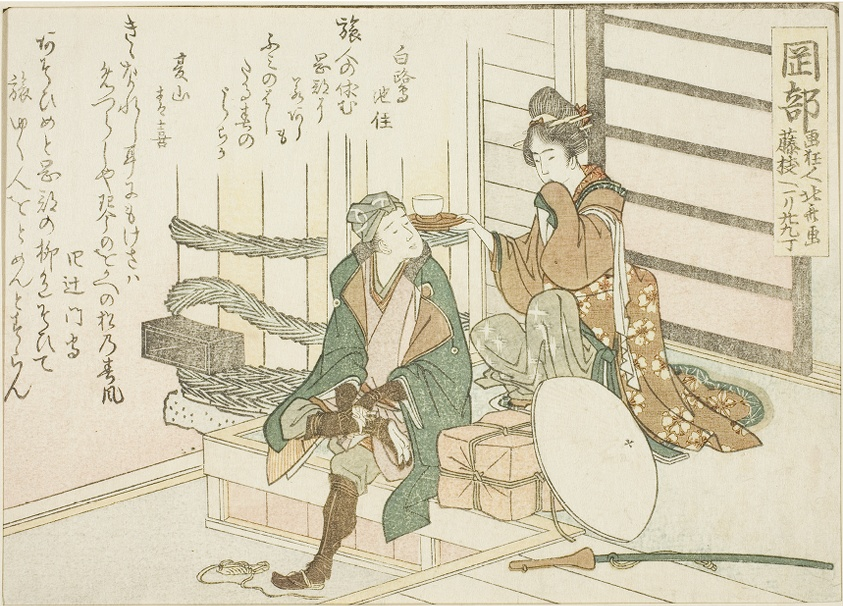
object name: Print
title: Okabe, from an untitled series of the fifty-three stations of the Tokaido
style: Japanese (culture or style)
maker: Katsushika Hokusai 葛飾 北斎; Japanese, 1760-1849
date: c. 1804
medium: Color woodblock print; kokonotsugiri-ban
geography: Japan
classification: woodblock print; print; asian art